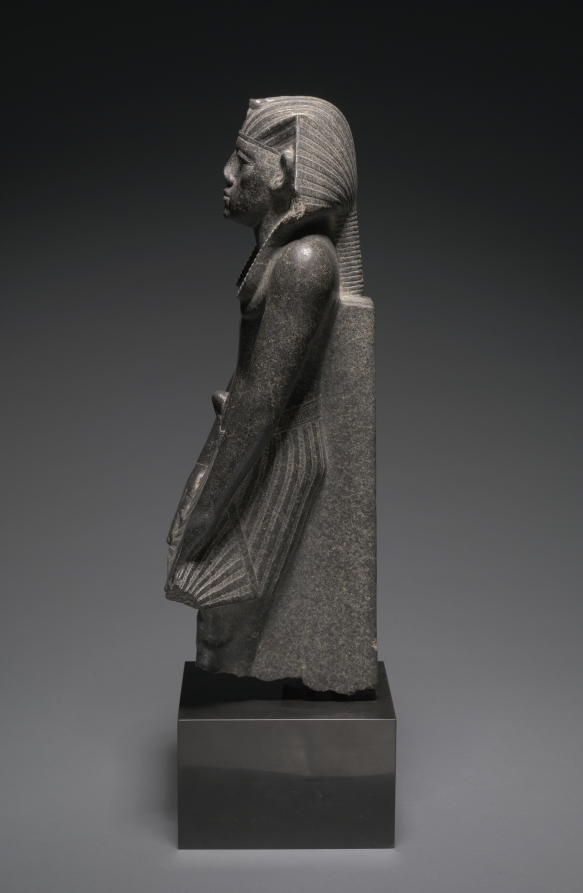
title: Statue of Amenemhat III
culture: Egypt, Middle Kingdom (2040–1648 BCE), Dynasty 12, reign of Amenemhat III (1860–1814 BCE)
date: c. 1859–1814 BCE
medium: granodiorite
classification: Sculpture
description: Even though this statue of a king is uninscribed, its distinctive features identify it without any doubt as a portrait of Amenemhat III. The heavy brows, prominent cheekbones, hollow cheeks, jutting lower jaw, and tightly bunched muscles at the corners of the mouth make a strikingly realistic impression. Not realistic, however, are the king’s supersized ears. Instead, they symbolize the ruler’s willingness to hear the prayers of his people. If this image had been carved in relief, the king’s hands would have been uplifted in worship. Here, however, to prevent the breakage of projecting limbs, the ruler’s hands are pressed flat against the front his kilt, a portion of which is looped over his belt.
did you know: The first pyramid Amenemhat III attempted to build, the so-called Black Pyramid, had major construction flaws and had to be abandoned when it started to collapse.